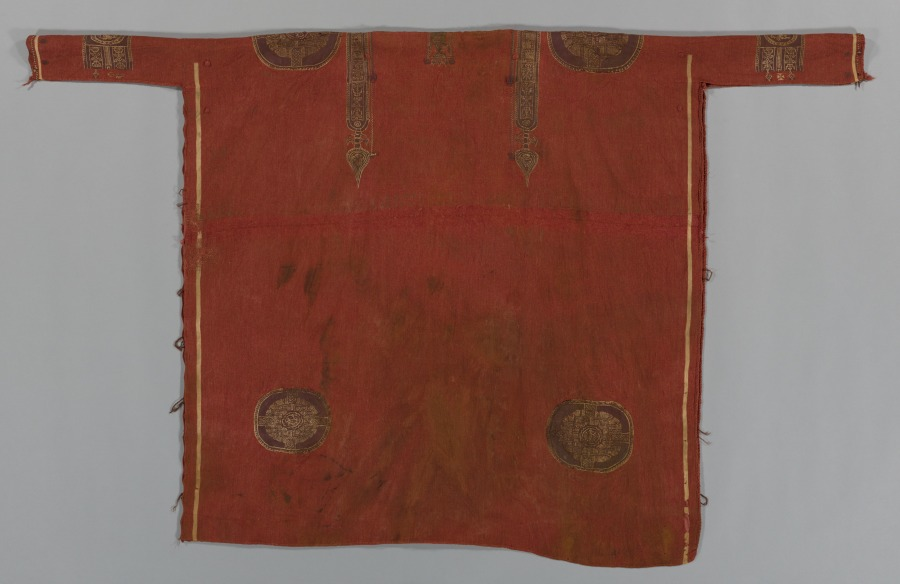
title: Luxurious Woolen Tunic with Decorated Bands and Roundels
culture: Egypt, Umayyad period (661–750)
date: 600s–700s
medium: undyed linen, dyed wool: weft-faced plain weave with slit- and dovetailed-tapestry weave, supplementary weft wrapping, embroidery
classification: Textile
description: Since the mid-200s CE tunics were the main garments worn in Egypt. This unisex tunic is decorated on the front and back with the same geometric and figural motifs, including men on horseback hunting and geometric braided knots that were believed to protect the wearer from harm. A red background was favored in the early Islamic period. Made of thick wool for cooler weather, it was woven in one complete piece with the front, back, and sleeves in this exact shape and size. The tunic’s owner repaired it on the left side and shortened it nearly two inches by sewing a fold around the waist. The discoloration and deterioration indicate the garment may have been used in a burial.